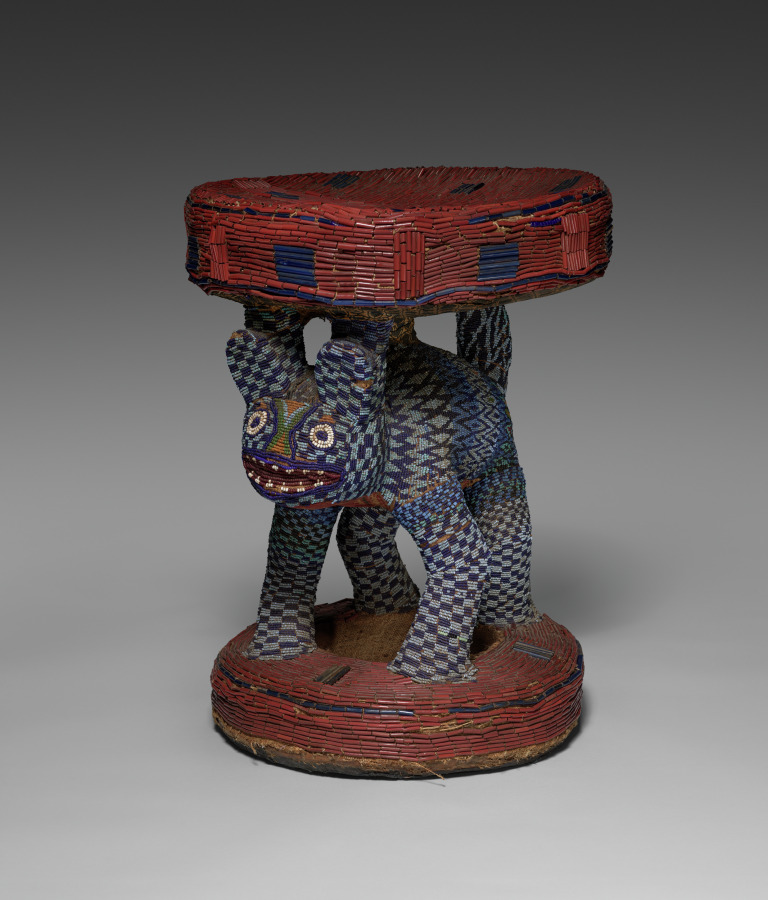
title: Prestige stool (Kuo fo)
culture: Africa, Central Africa, Cameroon, Bandjoun Kingdom, Bamileke makers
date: possibly 1800s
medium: Wood, cotton, plant fiber, glass beads, and indigo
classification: Furniture and woodwork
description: Bead-covered wooden stools and thrones are one of the most prevalent art forms among the various kingdoms and chiefdoms in the Cameroon Grassfields region. This example, once part of the royal treasury, belongs in the category of "travel stools," usually used in conjunction with more private, minor ceremonies and rituals at the palace. The leopard imagery confirms the object’s royal status. It alludes to the belief that the king could temporarily transform himself into this feared predator.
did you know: The beads on this stool were sewn on by hand. Look underneath the stool, however, and you can see commercially made printed fabric.